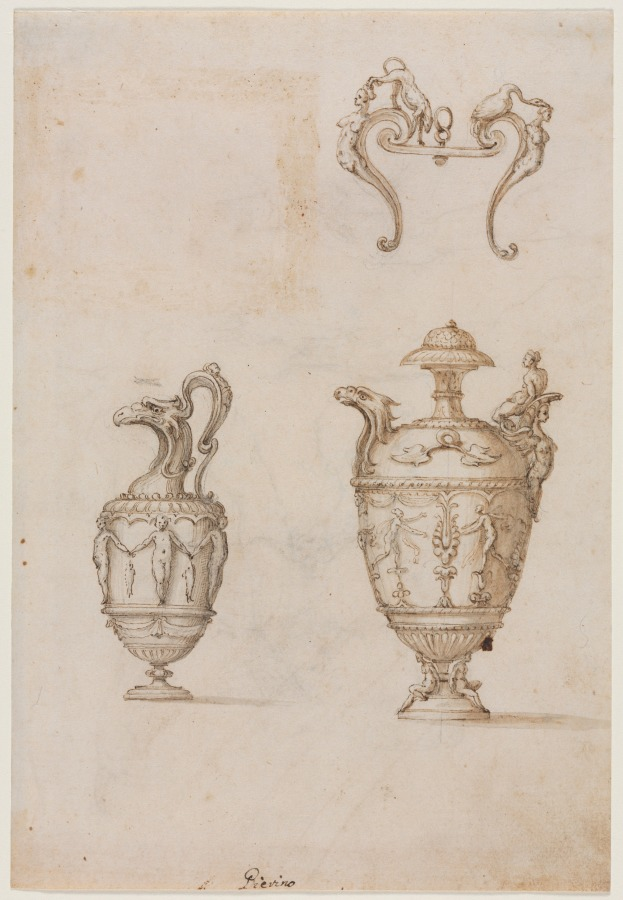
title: Design for Two Vases and an Ornament (recto); Sketches of Five Arms and a Head (verso)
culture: Italy, 16th century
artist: Luzio Romano (Italian, active 1528–75)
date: mid 1500s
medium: pen and brown ink and brush and brown wash, with brush and gray wash (left vase), over black chalk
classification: Drawing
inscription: lower center, in brown ink: Pierino